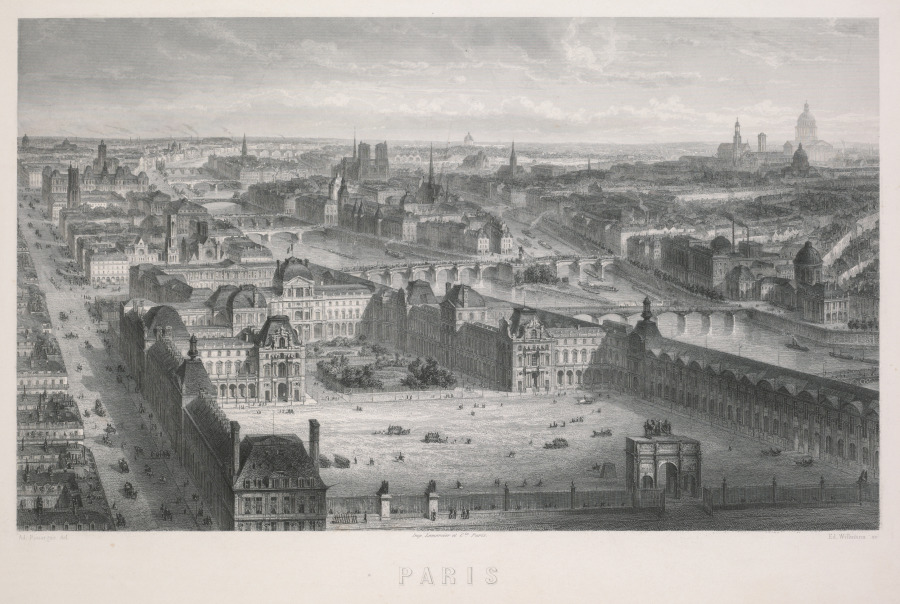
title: Paris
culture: France, 19th century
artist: Adolphe Rouargue (French, 1810–1870)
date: c. 1830–55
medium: lithograph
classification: Print